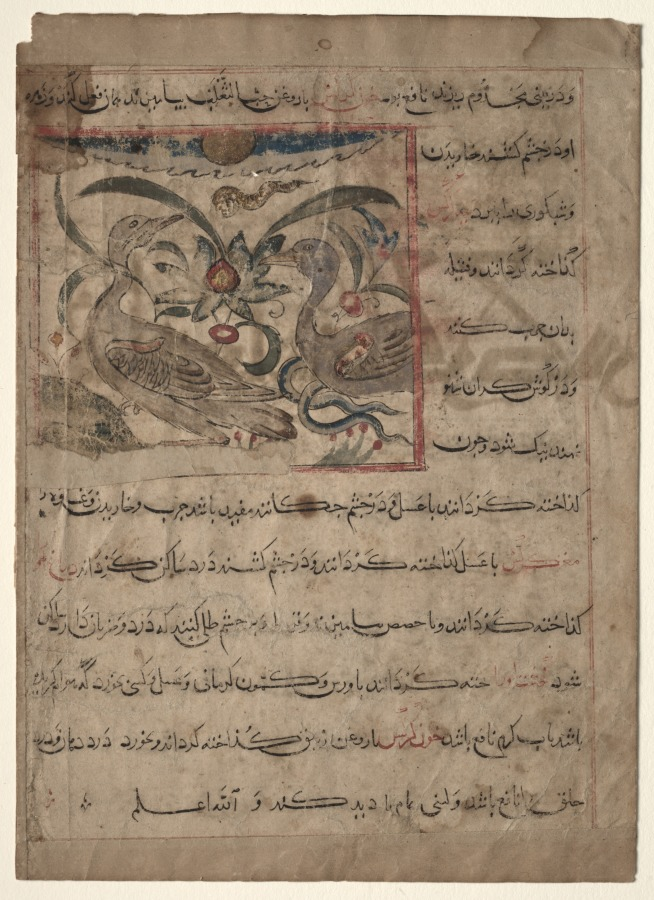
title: "Benefits of the Parts of Vultures" (From the Manafi' al-Haywan of Abu Sai'd Ubayd-Allay Ibn Bakhtishu) (recto)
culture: Iran, Marageh, Mongol Period (Ikhanid), late 13th Century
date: late 1200s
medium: opaque watercolor, ink and gold on paper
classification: Manuscript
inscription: Script: Naskh